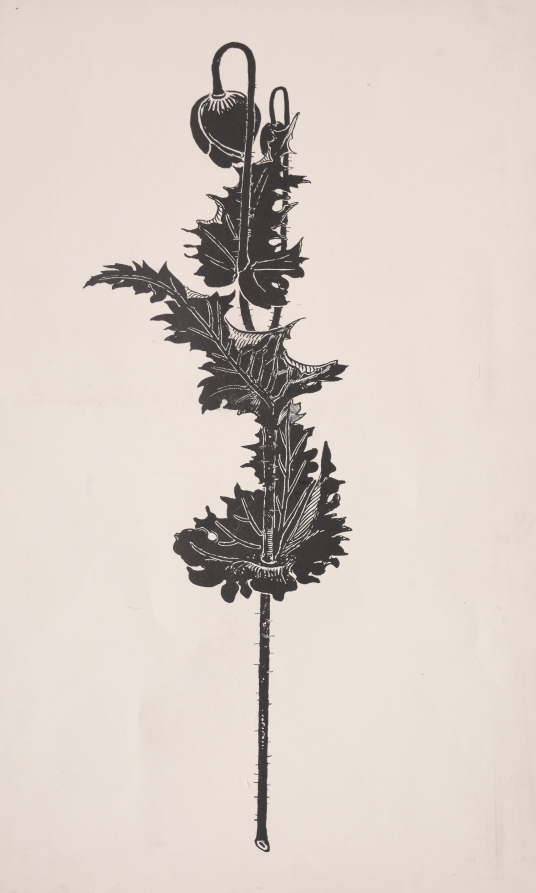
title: Flower Study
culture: America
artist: Harry Fenn (American, 1838/45–1911)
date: 1860–1911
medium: process cut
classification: Print